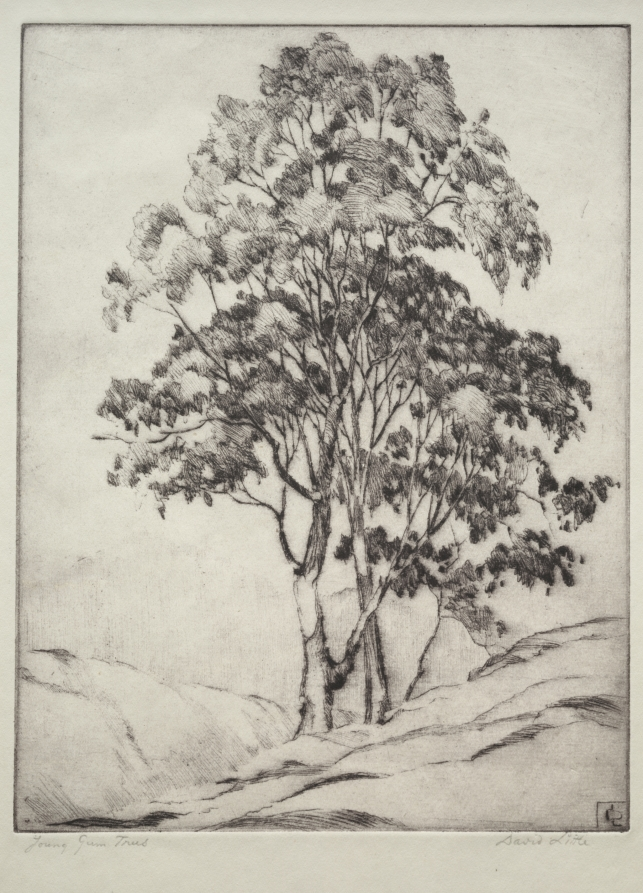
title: Young Gum Trees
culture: England, 20th century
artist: David Little (Australian, 1893–1951)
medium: etching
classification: Print